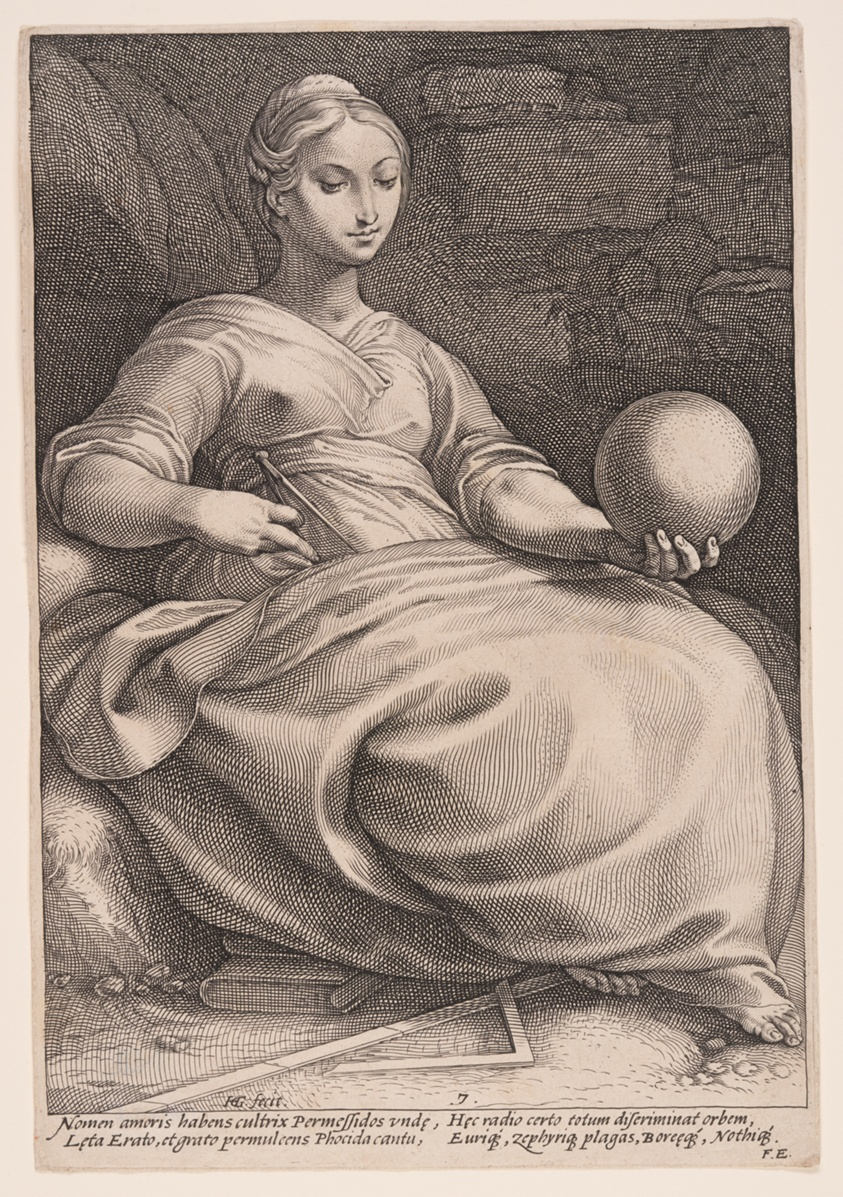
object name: Print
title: Erato, The Muse of Lyric Poetry, from The Nine Muses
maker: Hendrick Goltzius (Dutch, 1558–1617)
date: 1592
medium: Engraving on laid paper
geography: Netherlands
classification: print; engraving; paper; prints and drawing